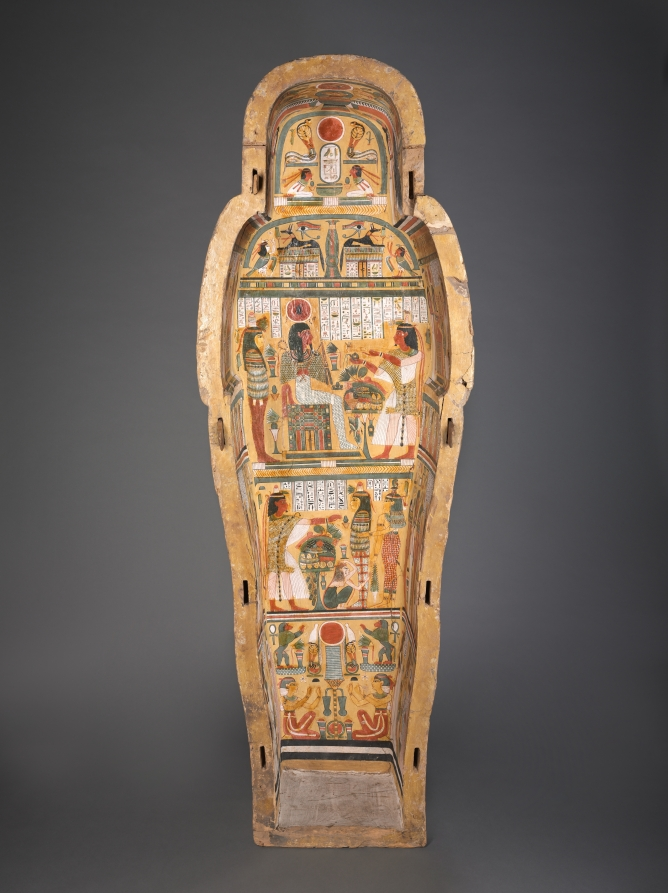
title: Coffin of Nesykhonsu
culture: Egypt, Thebes, Third Intermediate (1069–715 BCE), Dynasties 21–22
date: c. 976–889 BCE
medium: gessoed and painted sycamore fig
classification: Funerary Equipment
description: Egyptian coffins told stories and illustrated spells to help the deceased transition safely to the afterlife. Inside Nesykhonsu's coffin there are two jackals, one facing right and the other left, near the top. Here, the jackal represents the powerful deity Anubis, the god of the afterlife and embalming.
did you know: Two of Nesykhonsu's titles, "Lady of the House" and "Singer of the Choir of Mut the Great," are written on the outside of the coffin.